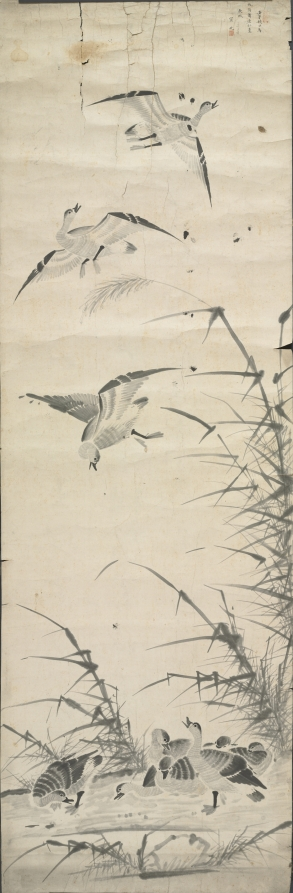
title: Wild Geese and Reeds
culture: Korea, Joseon dynasty (1392–1910)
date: 1392–1910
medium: Unmounted hanging scroll; ink on paper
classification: Painting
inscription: Artist's inscription with two seals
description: In this hanging scroll, wild geese are portrayed engaging in different activities: descending to a marsh, gathering in flocks, and grazing on plants. In Korean paintings, images of geese and reeds serve as the symbol of peaceful senior life; a homophone of geese and reeds means aging peacefully.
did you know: Paintings that depict a peaceful image of migratory white-fronted geese descending to a river bank where tall reeds gently bend in the evening breeze were widely favored as birthday gifts, especially to elders: a homophone of the title Geese and Reeds means Aging Peacefully.